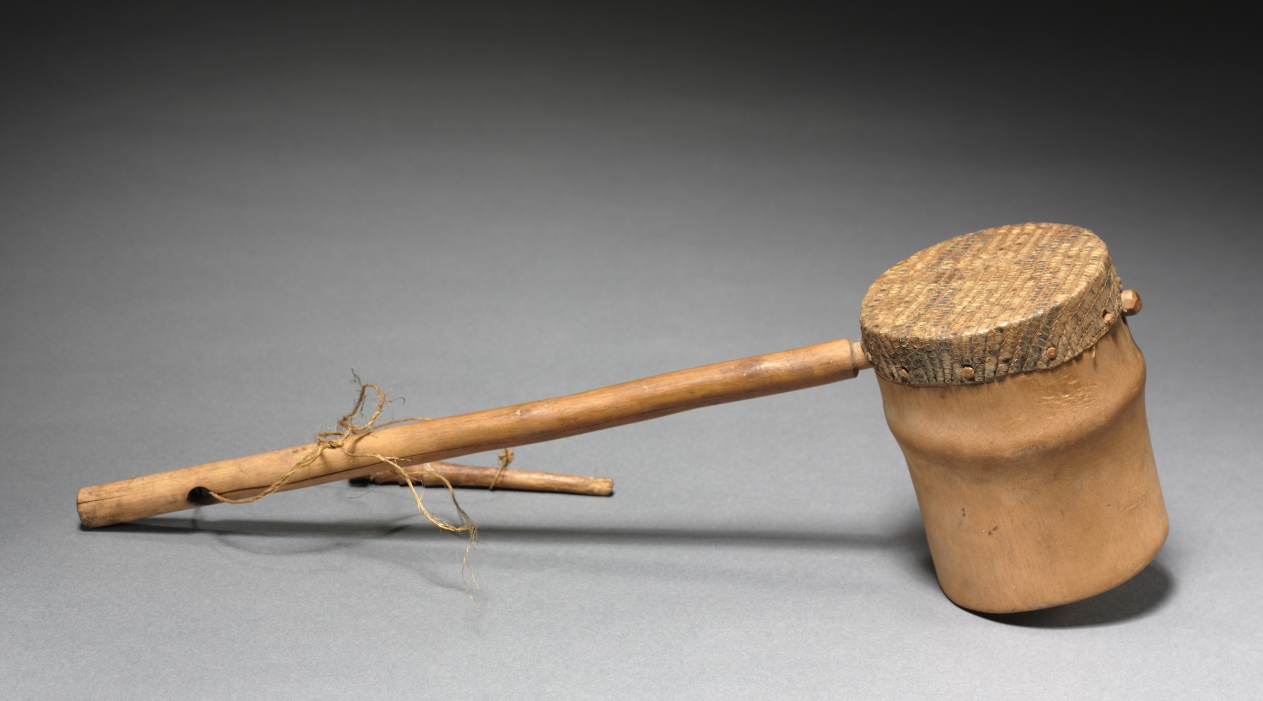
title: Spike fiddle (endingidi or iningidi)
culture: Eastern Africa, Uganda or Rwanda-Burundi, unknown maker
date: 1900s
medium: Wood, snakeskin, and plant fiber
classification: Musical Instrument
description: The endingidi is a single-stringed chordophone musical instrument. Scholars believe it was introduced into the Kingdom of Buganda (in present-day Uganda) between 1904 and 1907. From Uganda, it was later introduced to present-day Rwanda, where it is called iningidi and played by Hutu musicians. Horsehair stretched from the end of the handle and over the reptile-skin–covered tube sound box, and attached to the handle with the wooden tuning peg. A deeply curved bow, now missing, would have allowed a male musician to play the instrument as he held it vertically. Still played today, the music of the endingidi is often heard at weddings or played by royal Bugandan court musicians.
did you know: A photograph taken around 1929 shows that this instrument once had a tassle of long, black animal hair attached to the handle. This tassel beautified the instrument and gave it a dignified "clothed" presence when played at the Bugandan court.